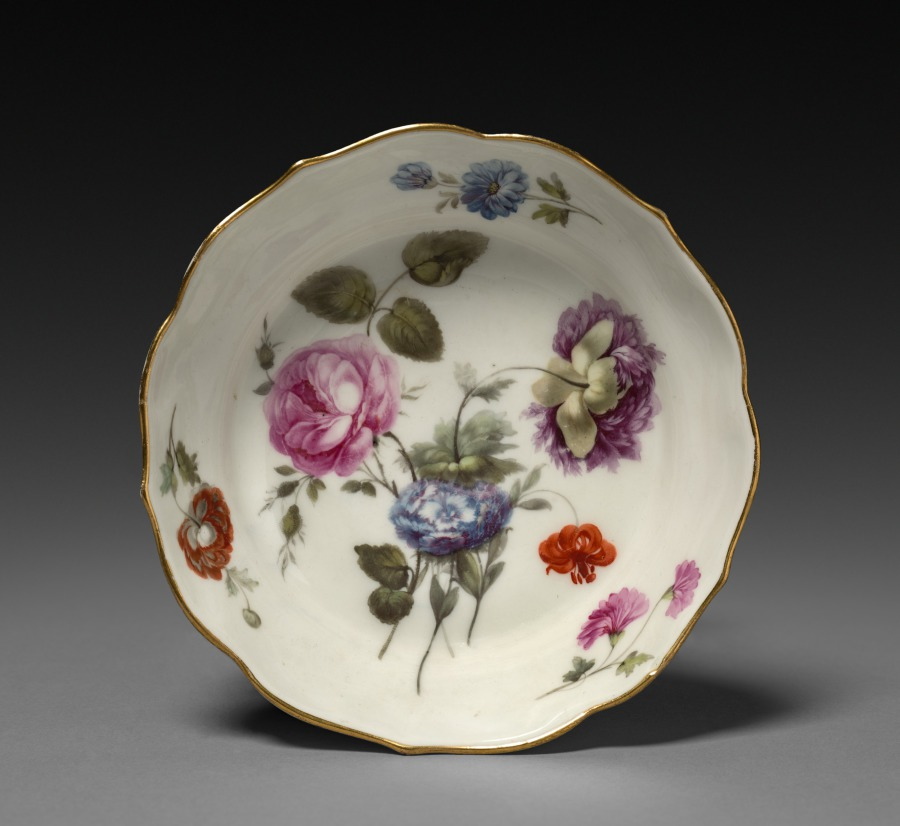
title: Bowl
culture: England, Derby, 18th century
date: c. 1790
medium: soft-paste porcelain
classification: Ceramic